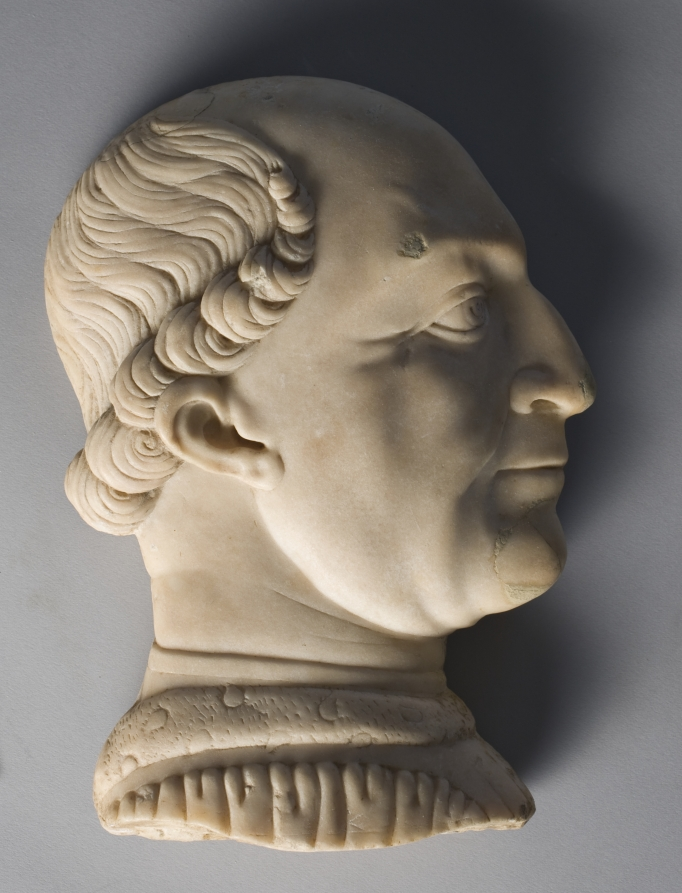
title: Portrait of Francesco Sforza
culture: Italy, Lombardy, 15th century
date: 1450–1499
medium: marble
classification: Sculpture